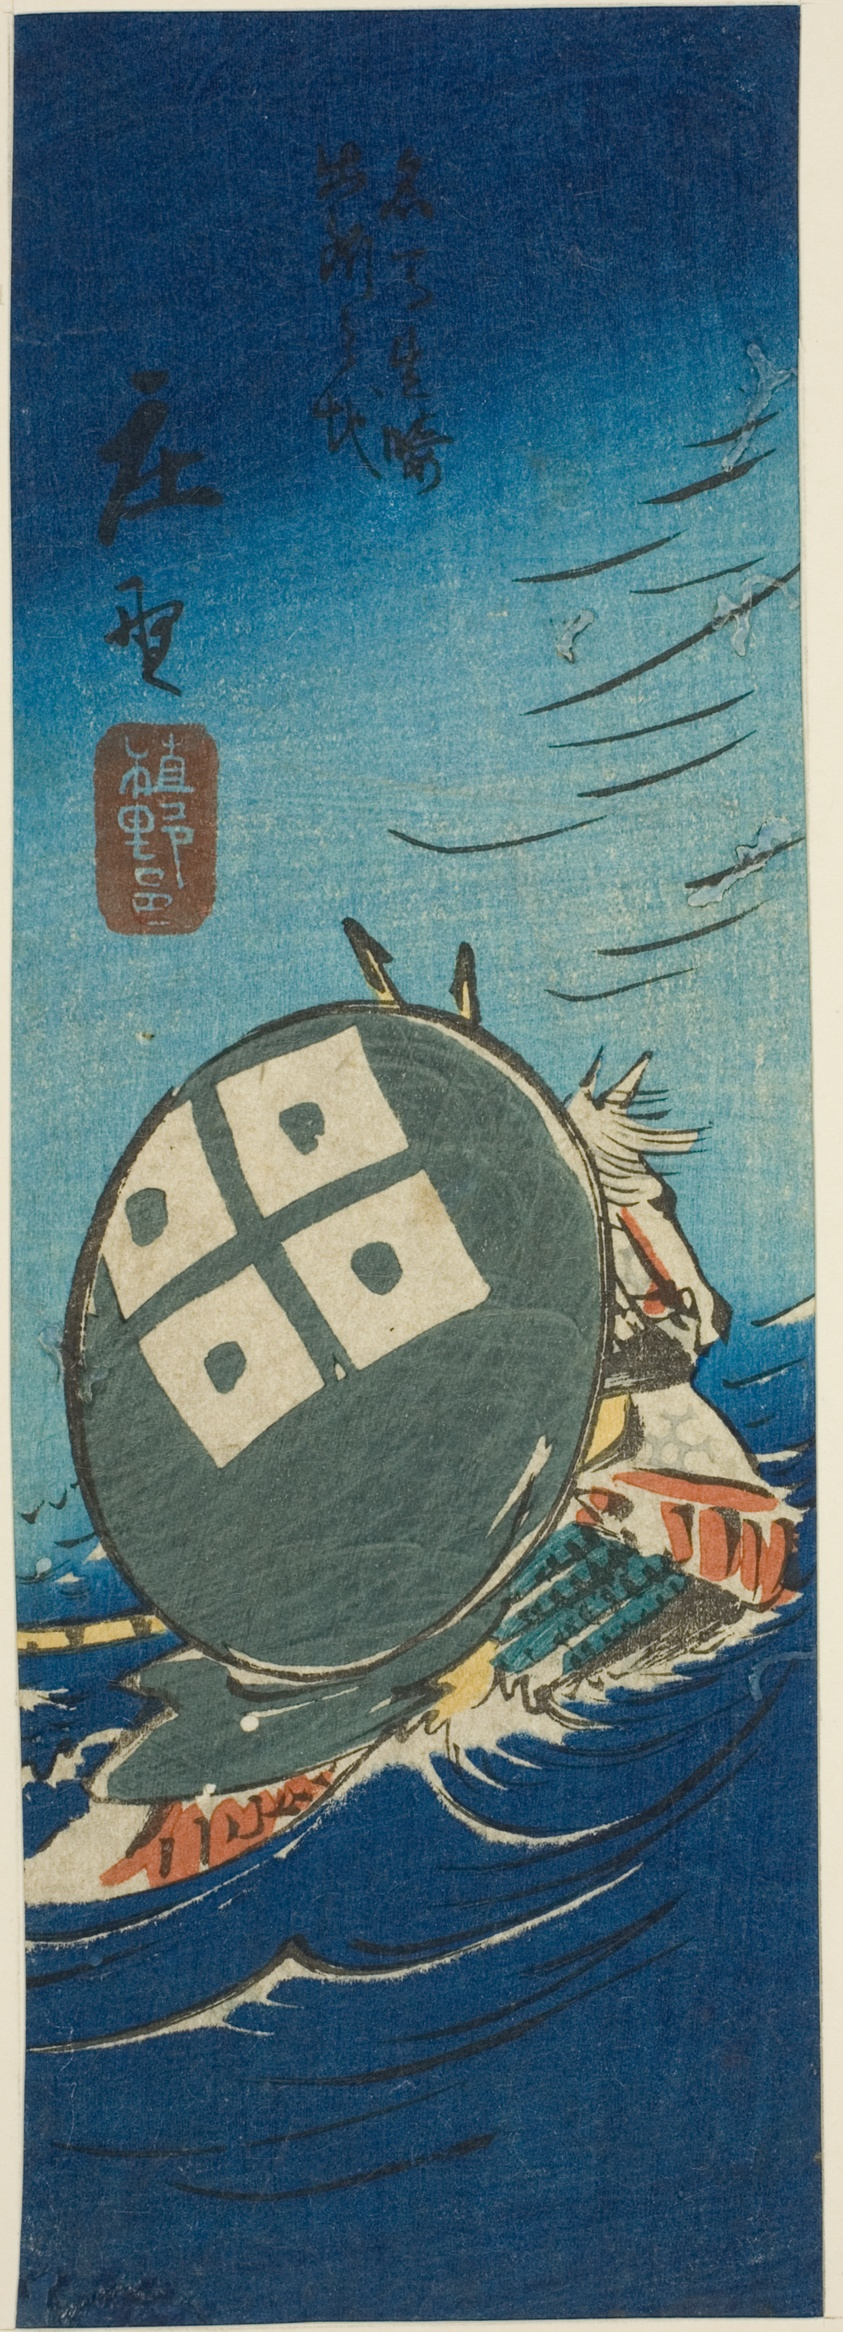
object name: Print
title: Shono, section of sheet no. 10 from the series "Cutout Pictures of the Tokaido (Tokaido harimaze zue)"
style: Japanese (culture or style)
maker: Utagawa Hiroshige 歌川 広重; Japanese, 1797-1858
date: c. 1848/52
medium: Color woodblock print; section of harimaze sheet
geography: Japan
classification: woodblock print; print; asian art